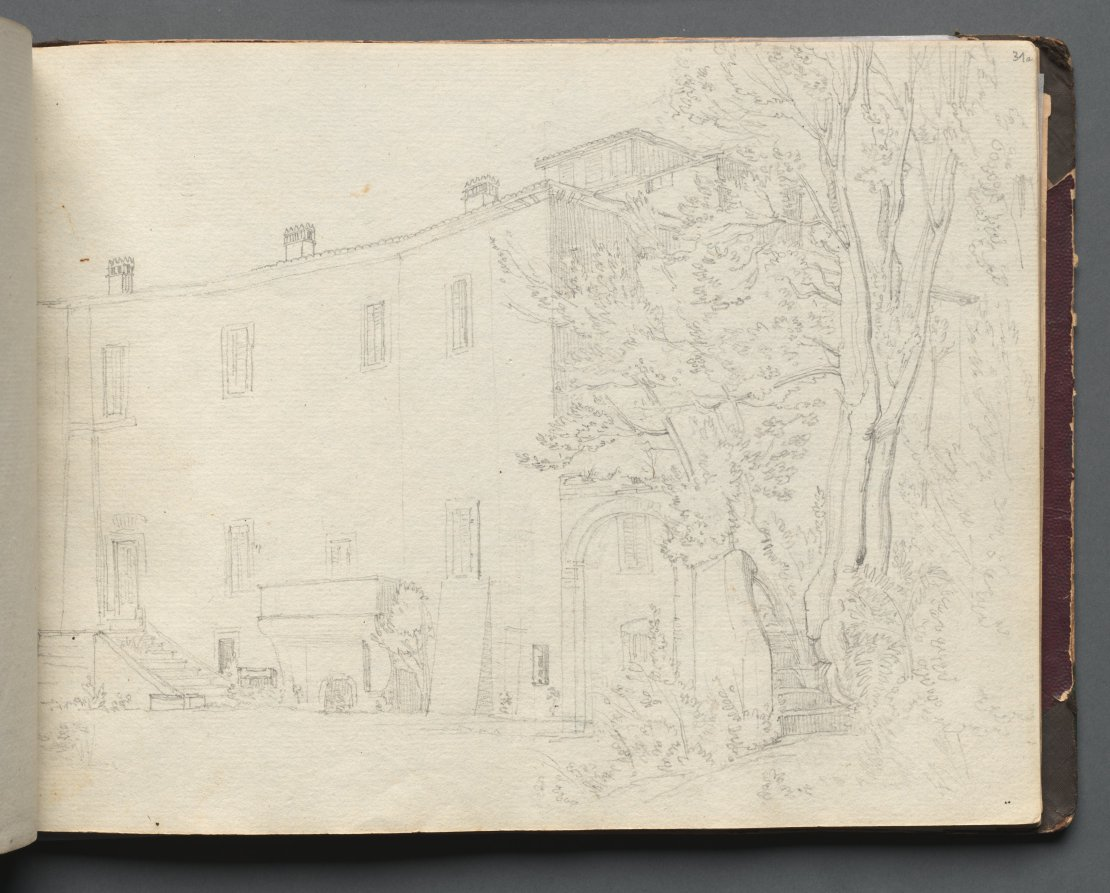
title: Album with Views of Rome and Surroundings, Landscape Studies, page 31a: Roman Archtectural Study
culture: Germany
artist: Franz Johann Heinrich Nadorp (German, 1794–1876)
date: c. 1830s-70s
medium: graphite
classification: Bound Volume